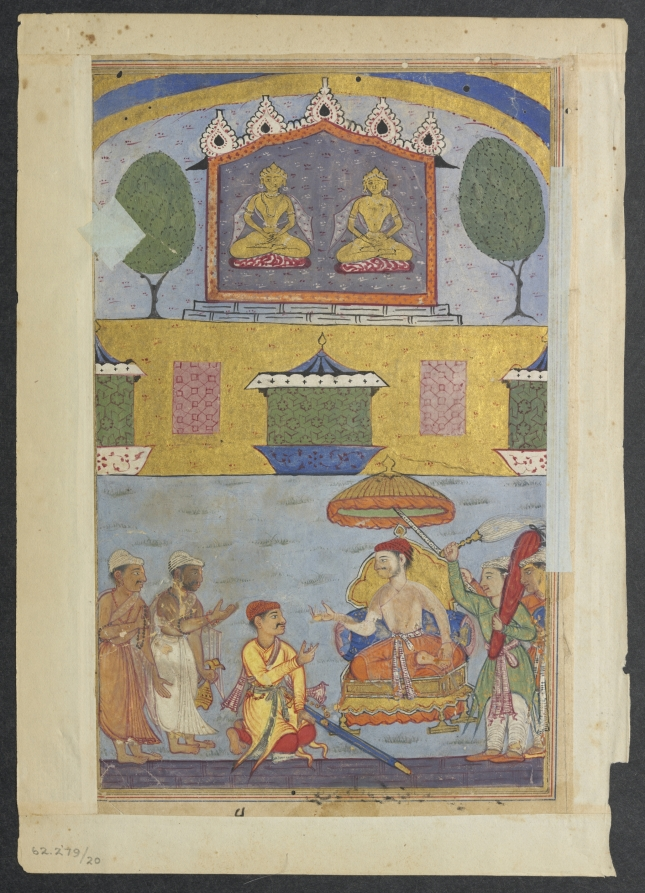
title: The goldsmith and the carpenter inform the king of a dream in which the golden images plan to desert the city for lack of worshippers, from a Tuti-nama (Tales of a Parrot): Third Night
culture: Mughal India, court of Akbar (reigned 1556–1605)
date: c. 1560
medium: gum tempera, ink, and gold on paper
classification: Painting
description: In this story, a goldsmith and a carpenter plan to steal a city’s idols by convincing the king that they have left on their own. They appear before the king, who addresses them from beneath a parasol in the lower register. The two golden idols sit in a shrine in the upper register.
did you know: The dark-skinned figure on the left was originally painted in a peach toned complexion that is still visible on his torso.